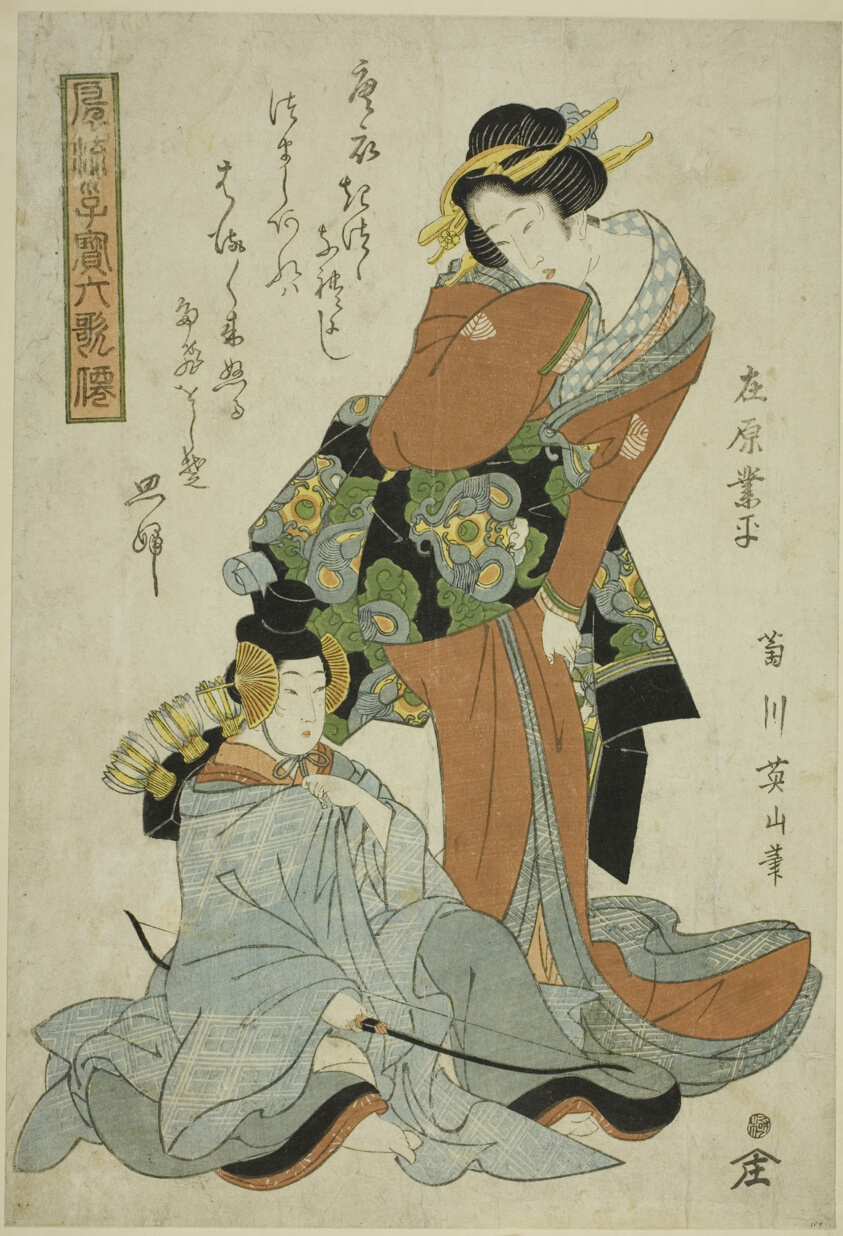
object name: Print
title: Ariwara no Narihira, from the series "Fashionable Children as the Six Immortal Poets (Furyu kodakara rokkasen)"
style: Japanese (culture or style)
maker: Kikukawa Eizan (Japanese, 1787-1867)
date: c. 1814/17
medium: Color woodblock print; oban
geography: Japan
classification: woodblock print; print; asian art